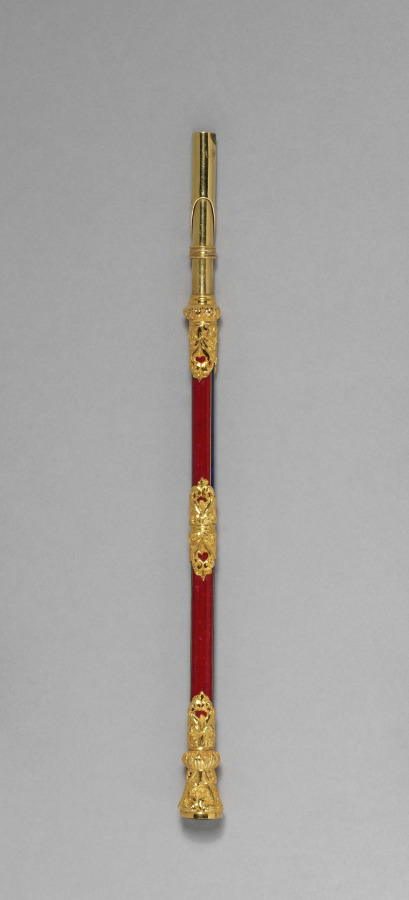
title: Pen from a Writing Set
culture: England, mid-19th century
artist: John Hamilton Mortimer (British, 1740–1779)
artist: and Paul Storr (British, 1771–1844)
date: c. 1830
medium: hardstones including lapis lazuli, malachite, carnelian, agate, gold; original fitted velvet-lined case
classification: Miscellaneous